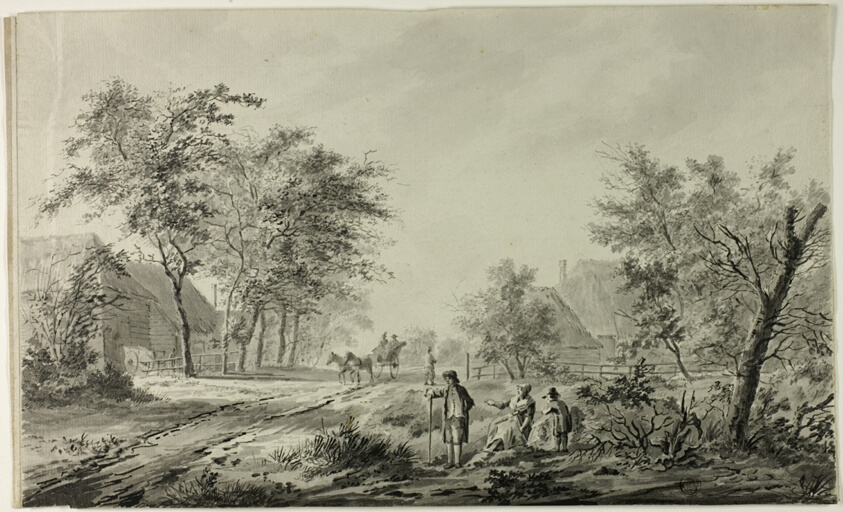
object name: Drawing and Watercolor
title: Outskirts of Nodorp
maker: Attributed to Wouterus Verschuur (Dutch, 1812-1874); or possibly Willem van de Velde, II (Dutch, 1633-1707)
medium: Pen and gray ink, with brush and gray wash, over traces of graphite, on ivory laid paper, laid down on ivory laid paper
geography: Holland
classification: ink or chalk wash; drawings (visual works); prints and drawing